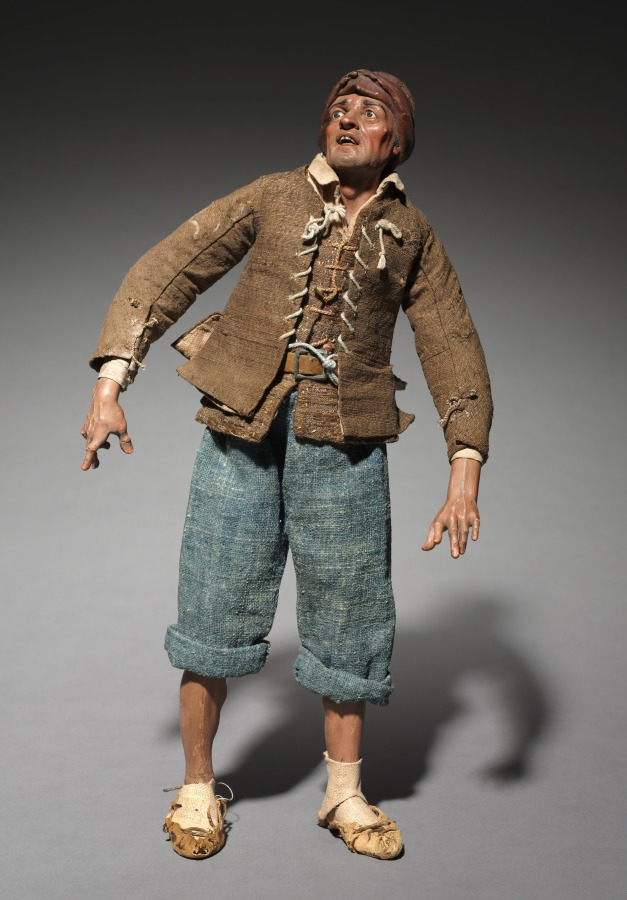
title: Figure from a Crèche: Shepherd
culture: Italy, Naples, late 18th-early 19th century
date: 1780–1830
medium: painted wood and terracotta with various textiles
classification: Sculpture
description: The practice of creating scenes of the Nativity for the home dates from the early 1700s in Italy, where people began to set up doll-like figures of about a foot or less in height. The custom was particularly popular in Naples around 1800, where crèche scenes (crèche means cradle, or crib) included many figures, whose heads and hands of painted terracotta, stuffed cloth bodies, and clothing adapted from contemporary local costumes gave them an amazingly realistic character. Representations of the birth of Jesus can be traced to the first few centuries of Christianity. Both living creatures and sculptural depictions of them were used from early times. By the late middle ages it was customary to create life-size figures of wood or stone, naturalistically painted, to represent the characters who participated in the events of Jesus's early life. These sculptures were then arranged in scenes illustrating one or both of the most important of these events, the Adoration of the Shepherds and the Adoration of the Magi-the three kings from the East who came to pay homage to the Christ child. Used in churches, these large figures were especially popular in Italy, Central Europe, Spain, and Portugal.